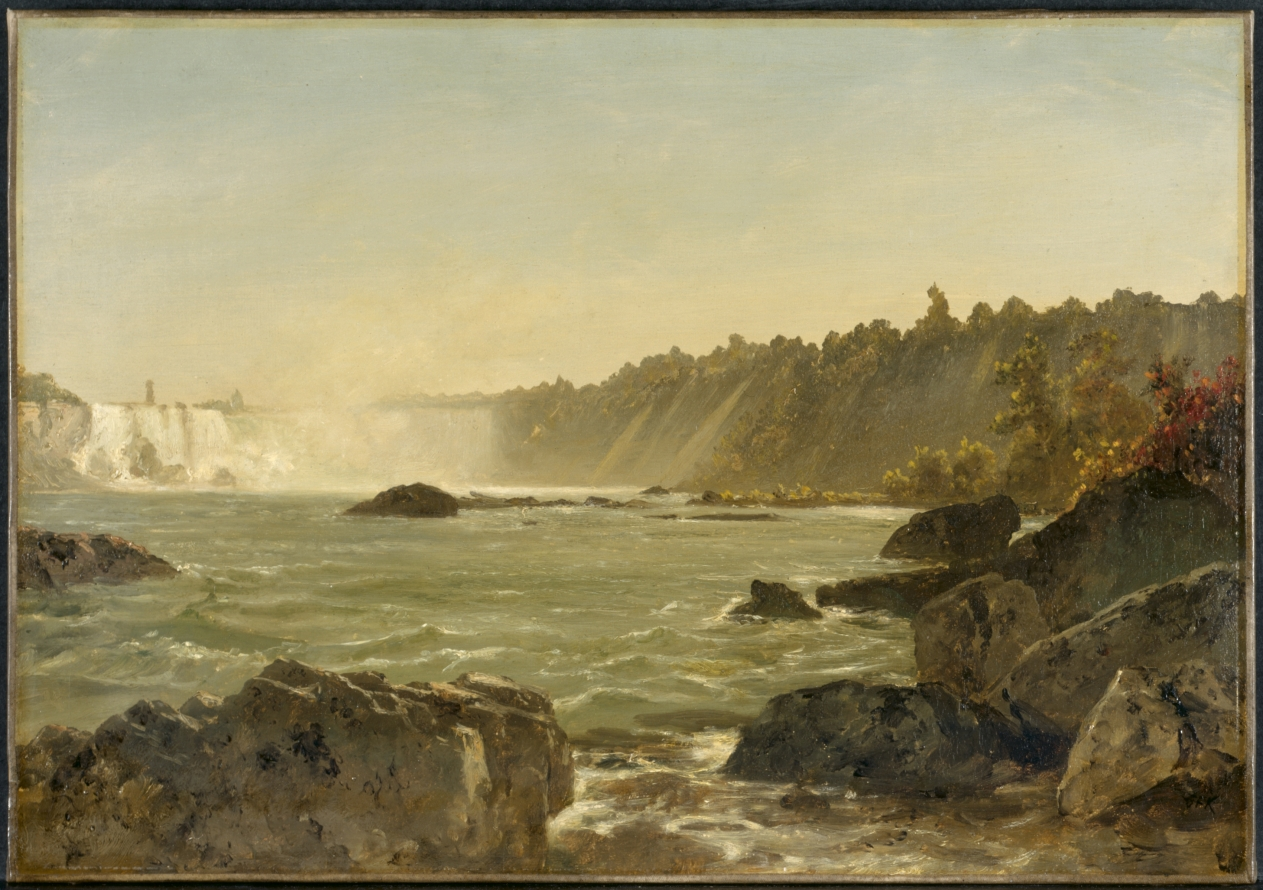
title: View of Niagara Falls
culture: America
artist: John Frederick Kensett (American, 1816–1872)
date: c. 1851–1852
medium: oil on canvas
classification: Painting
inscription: signed lower right: JFK